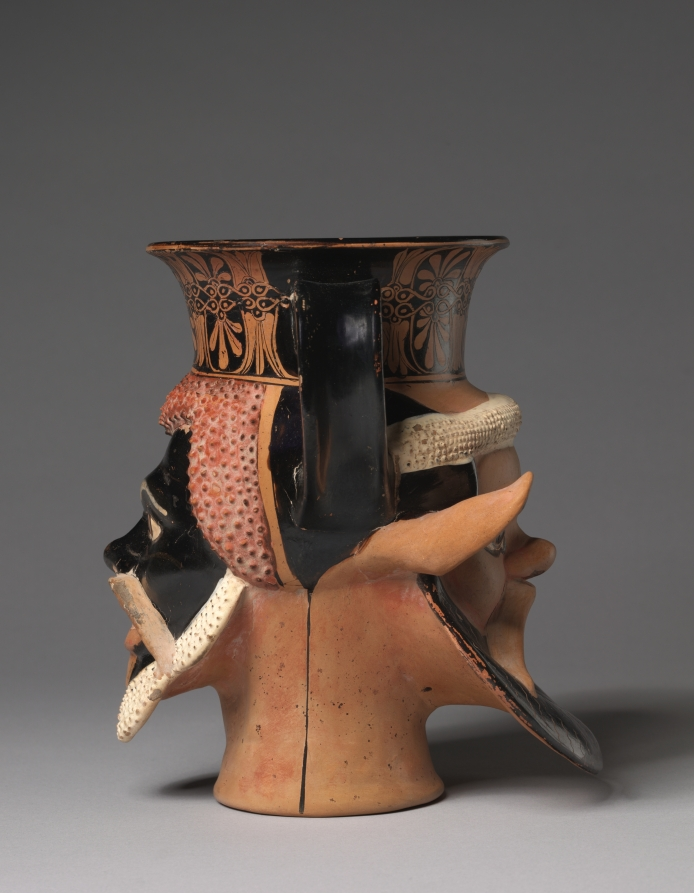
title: Red-Figure Janiform Kantharos (Two-Sided Head-Shaped Drinking Cup): Satyr and African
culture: Greek, Attic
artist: assigned to Class K (The Toronto Class)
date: c. 470–460 BCE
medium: ceramic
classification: Ceramic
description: Combining two mold-made faces beneath a pair of vertical handles and a flaring, wheel-made lip, this unusual drinking cup is a variation of the kantharos, a vessel favored by the wine god Dionysos. A snub nose and equine ears identify the satyr, a relatively common type on such vessels. The glossy black face and red hair on the other side are more unusual, apparently meant to show an older African man, with white beard and eyebrows, and wrinkles around the eyes.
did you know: This janiform kantharos is unique in juxtaposing heads of a satyr and an African man.